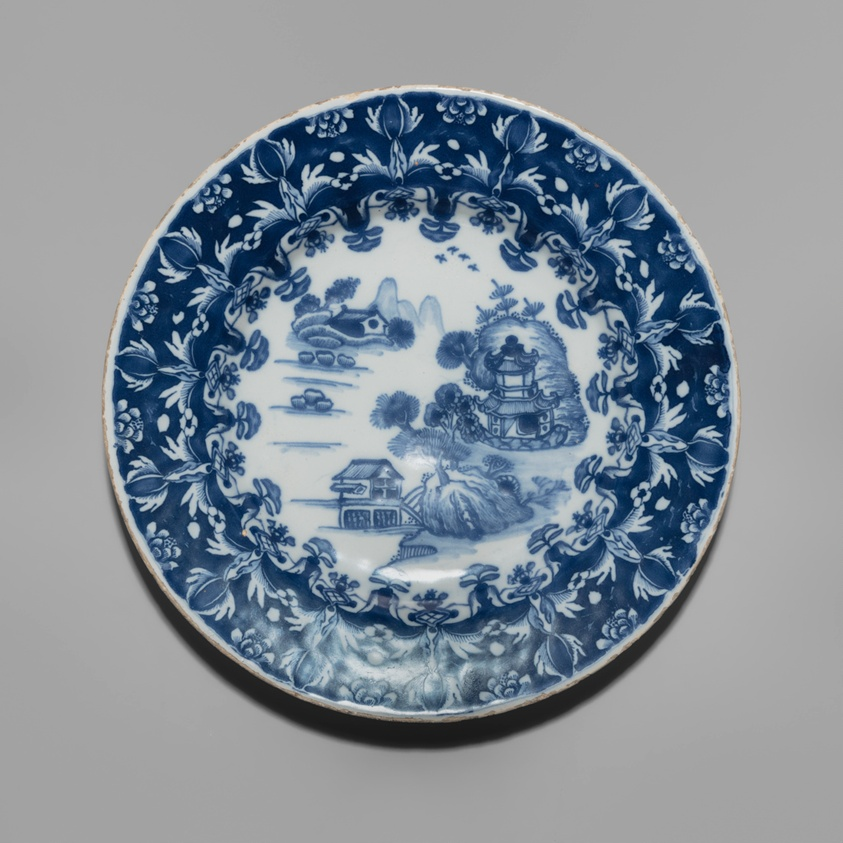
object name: Ceramics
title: Plate in the Three Chinese Houses Pattern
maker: Dublin, Ireland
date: 1760/70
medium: Tin-glazed earthenware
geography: Dublin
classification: earthenware; plate (general, dish); decorative arts; ceramics; european decorative arts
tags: landscapes, Chinoiserie